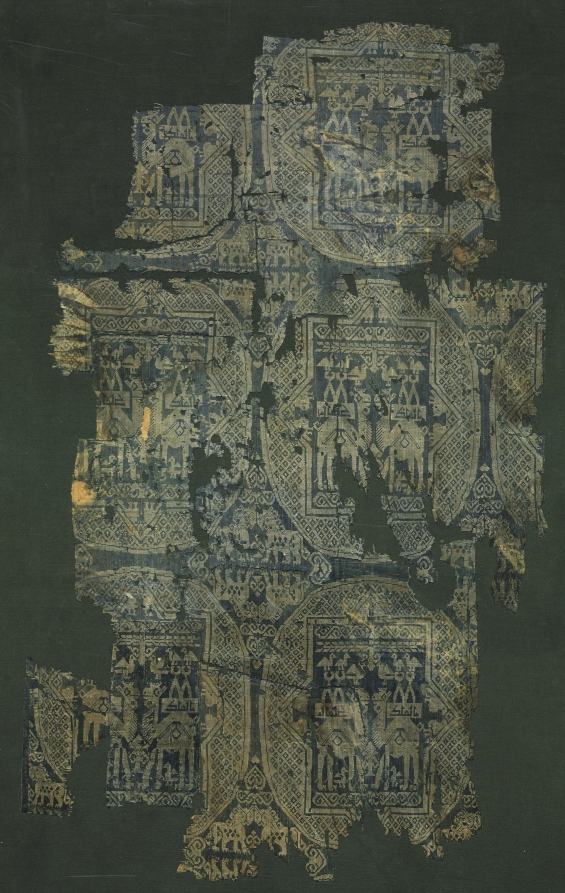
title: Roundels with camels bearing howdahs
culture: Syria (?), 900s - 1000s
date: 900s–1000s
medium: silk: plain weave variation with supplementary weft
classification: Textile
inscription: al-mulk lillah (Dominion belongs to God)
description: This unusually large fragment is part of a rare group of silks characterized by an unusal weave structure. The group is most important, however, because the Kufic inscriptions (here "mulk," or "Dominion," an abbreviation of "al-mulk lillah," meaning "Dominion belongs to God") demonstrates their Islamic origin. The Byzantine motifs found in some of them (for example, a second fragment in the museum collection), however, lead scholars to believe they may have been woven in Antioch, the scene of much fighting between Muslims and the Crusaders. These fragments become, therefore, fascinating evidence of two traditions occurring in one area.